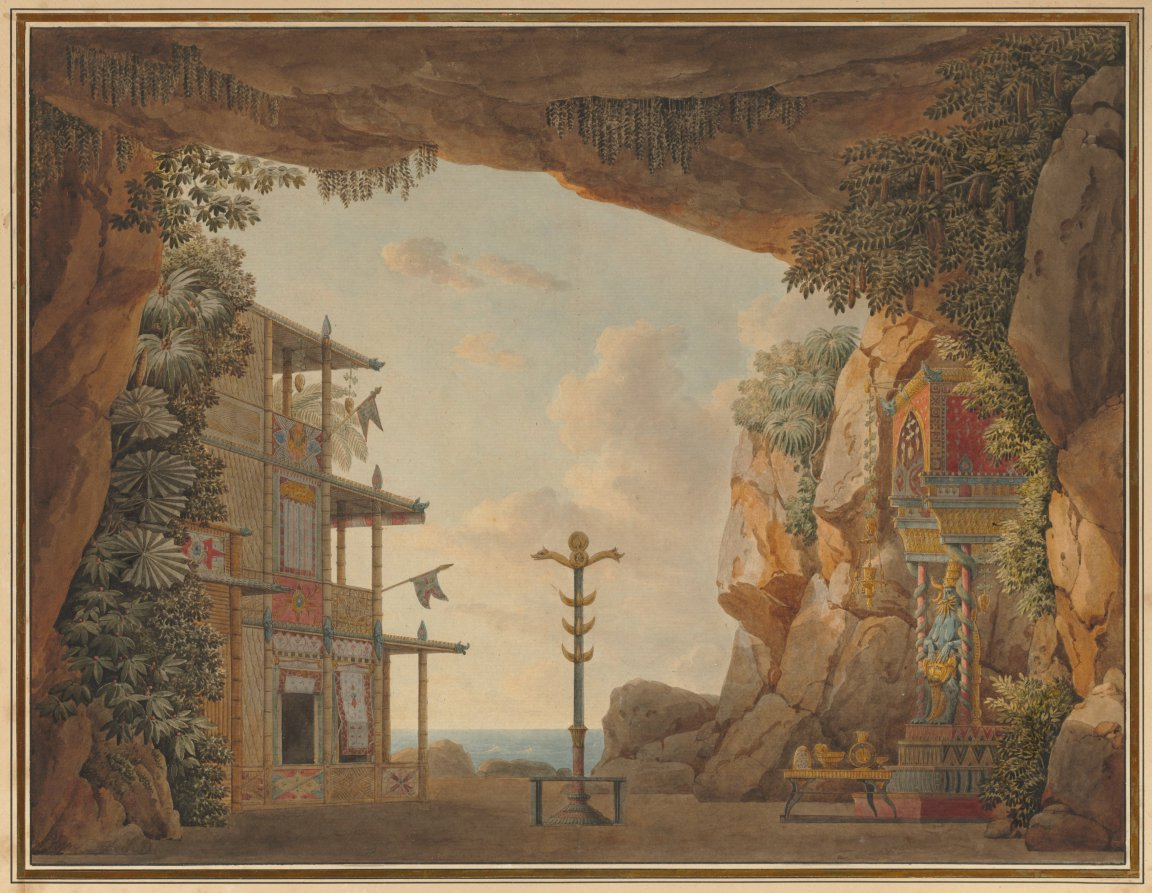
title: Design for Stage Set for the Second Act of Elisca or L'Habitante de Madagascar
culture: France, late 18th Century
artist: Jean Thomas Thibault (French, 1757–1826)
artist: Charles Percier (French, 1764–1838)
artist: Pierre François Léonard Fontaine (French, 1762–1853)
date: 1798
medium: pen and black ink and watercolor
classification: Drawing